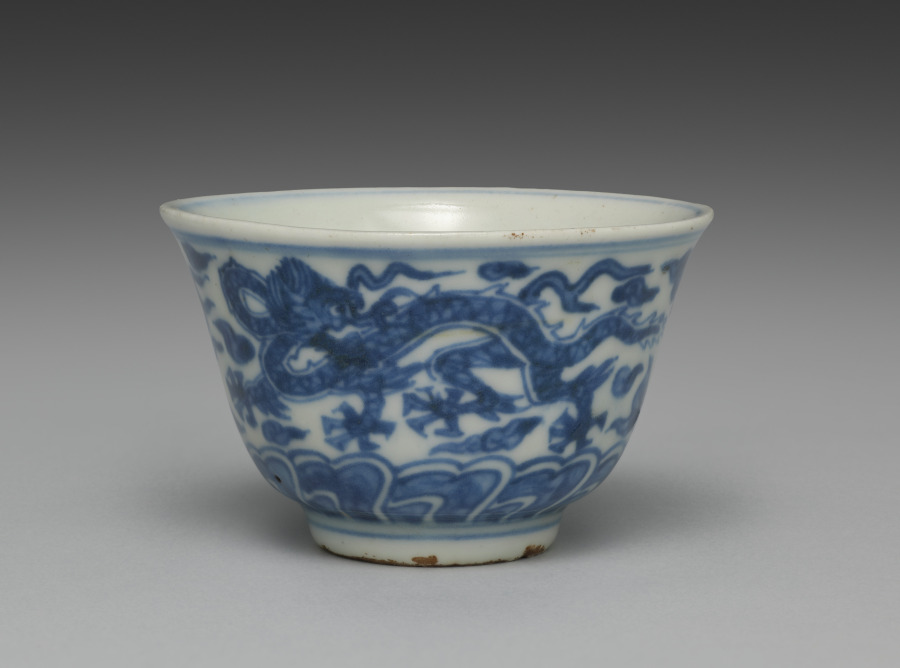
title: Cup from Tea Cups with Dragons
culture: Japan, Edo period (1615–1868)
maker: Seifū Yohei I (Japanese, 1801–1861)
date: 1840s–57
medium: One from a set of five tea cups; porcelain with underglaze blue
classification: Ceramic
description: Seifū Yohei I made both blue and white porcelains after Ming dynasty (1368–1644) Chinese wares fired in the kilns at Jingdezhen for export. He also made colorful stoneware in the style of his teacher, Nin’ami Dōhachi (Takahashi Dōhachi II) (1783–1855).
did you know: A small figure of an elephant serves as the handle for the lid.